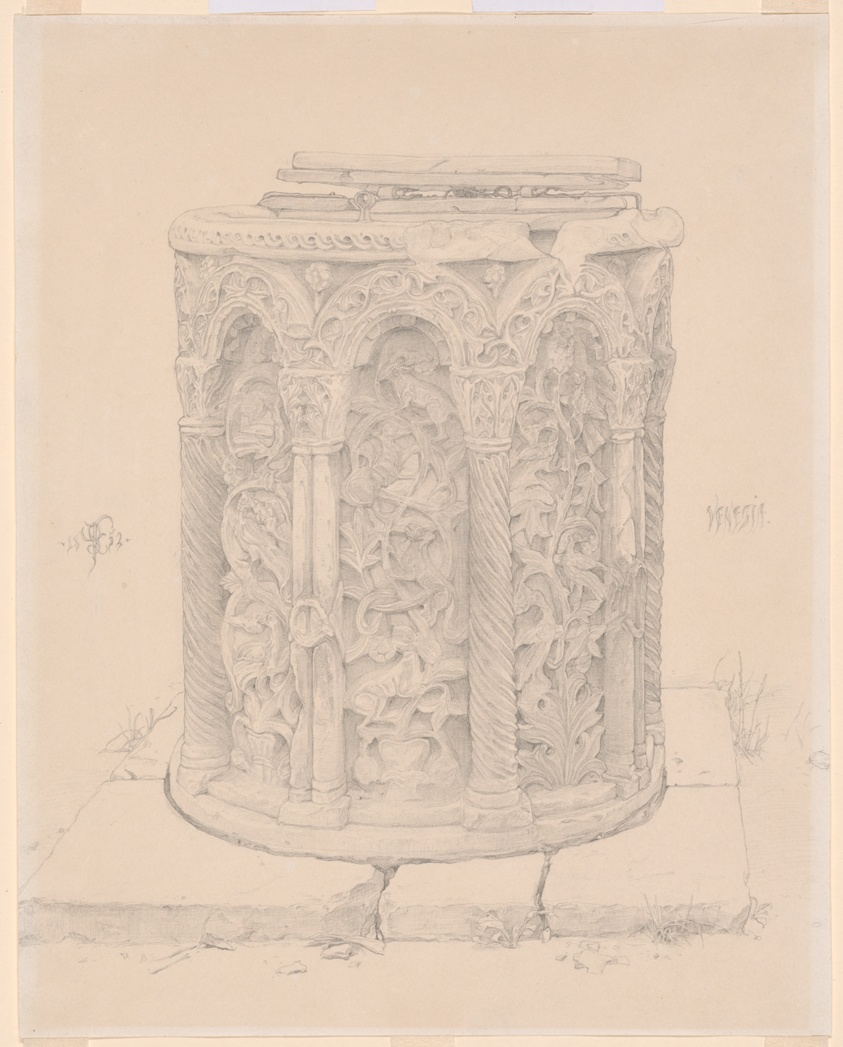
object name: Drawing and Watercolor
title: A Byzantine Well-head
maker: Frederic Leighton, 1st Baron Leighton of Stretton (English, 1830-1896)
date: 1852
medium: Graphite on ivory wove paper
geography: England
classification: prints and drawing; paper; graphite; drawing